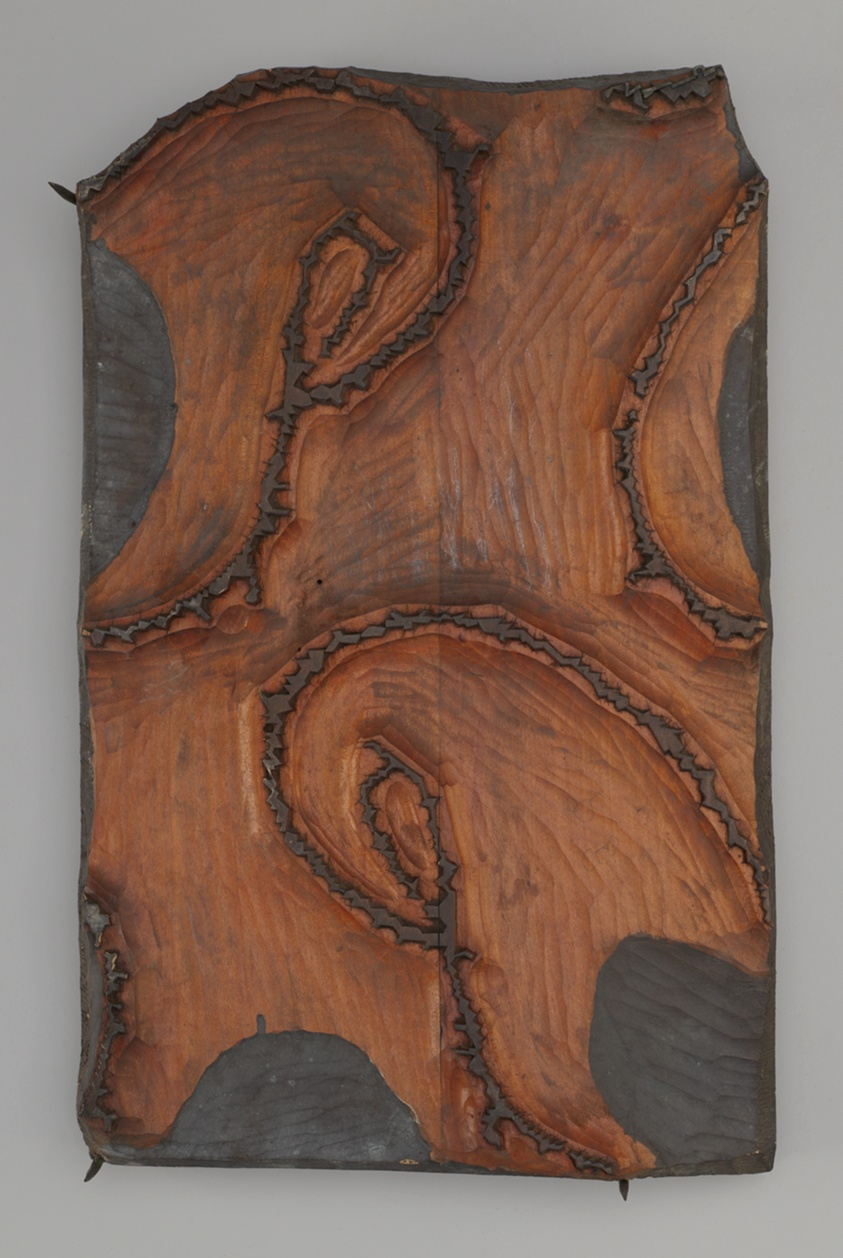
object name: Textile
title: Six Printing Blocks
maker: England or France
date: before 1850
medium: Carved wood, treated in a variety of techniques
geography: England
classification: printing blocks (printing surfaces); textile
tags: paisley